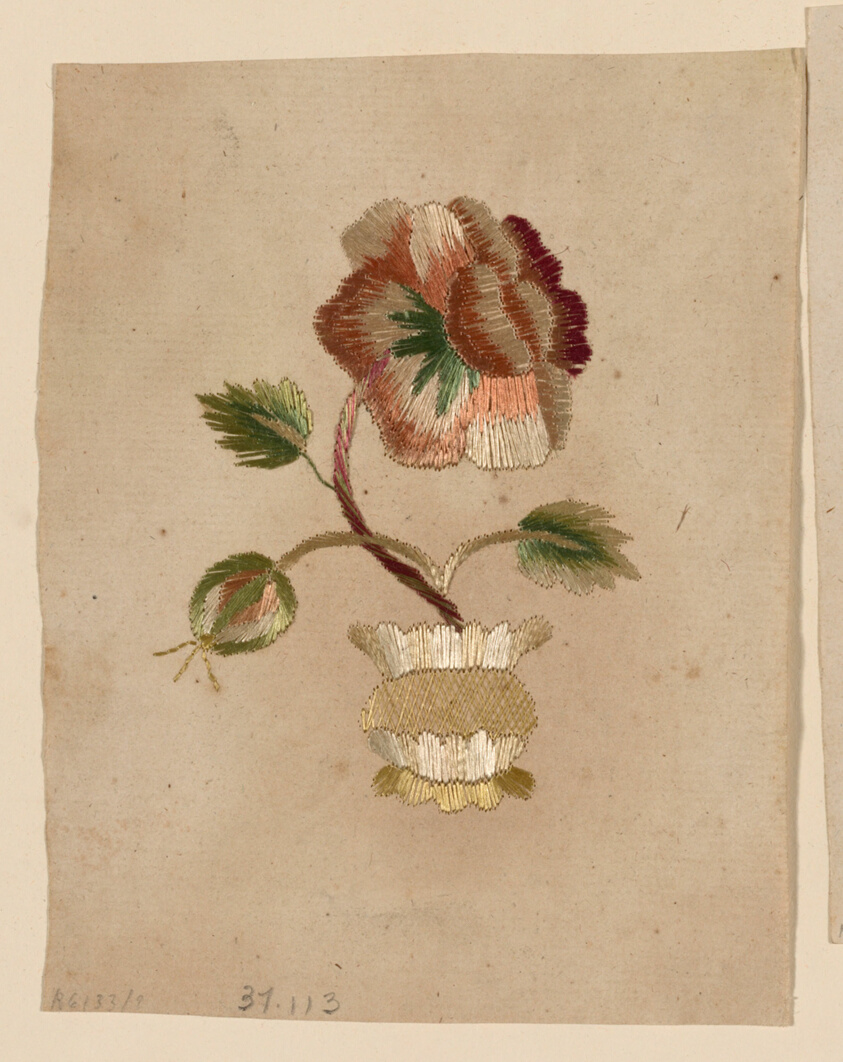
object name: Textile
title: Pattern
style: bukhara, central asian, asian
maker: Bukhara, Turkestan, Uzbekistan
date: 18th century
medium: embroidery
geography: Uzbekistan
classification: textile; needlework (visual works)